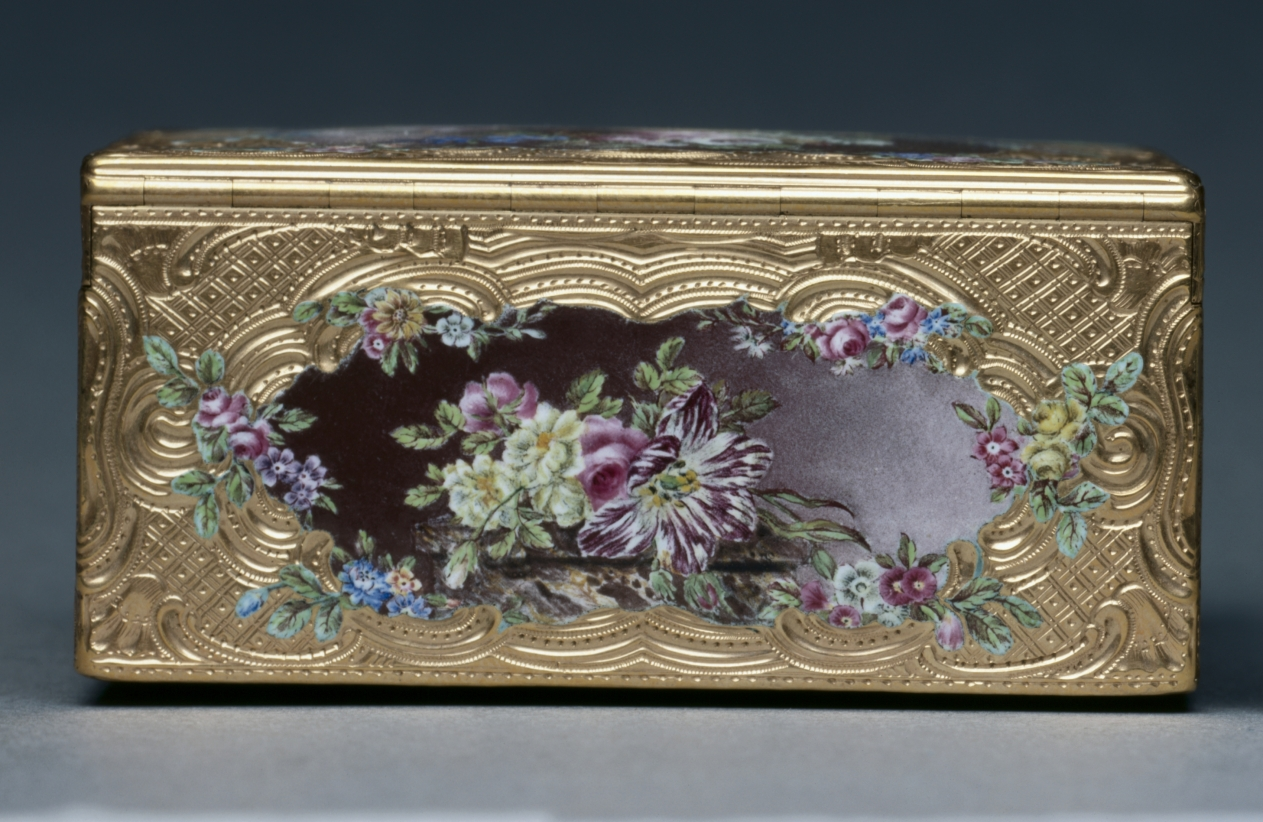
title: Snuff Box (Tabatière)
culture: France, 18th century (style of Louis XV)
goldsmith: Francois Guillaume Tiron (French)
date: 1756–57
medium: gold and enamel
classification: Miscellaneous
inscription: [Maker's mark of Francois-Guillaume Tiron, master goldsmith in 1747, inside cover; left wall]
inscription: [Warden's mark for Paris, 1756-1757, inside cover]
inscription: [Charge mark of Julien Berthe, Paris, 1750-1756, inside cover; left wall]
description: The miniature paintings that decorated snuff boxes were depicted in intricate detail requiring complex technical skill. This box’s miniatures are painted with enamel en plein, meaning the enamel has been applied directly to the metal of the box. A different enameling technique, basse-taille, is used to depict the doves and floral borders. Here, the gold has been chiseled away and filled with translucent enamel in order to produce a three-dimensional effect.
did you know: In the mid-1700s François-Guillaume Tiron worked alongside his brother, Jean-Marie Tiron, one of the most celebrated makers of gold boxes of the 18th century.